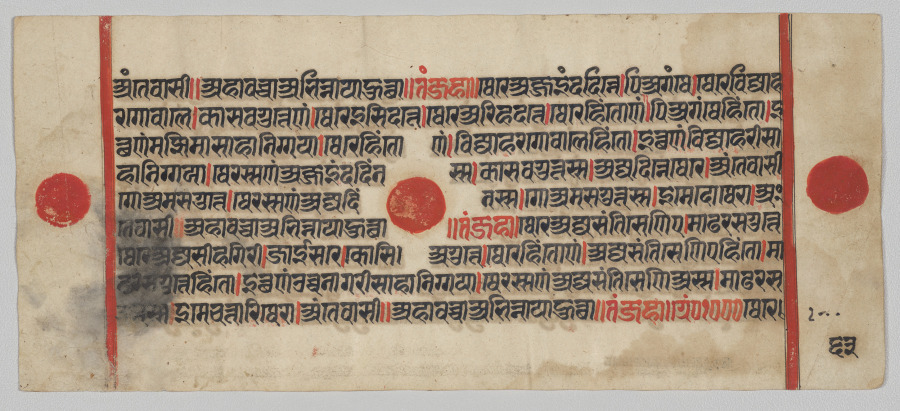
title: Text, Folio 63 (verso), from a Kalpa-sutra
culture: Western India, Gujarat, last quarter of the 15th century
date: c. 1475–1500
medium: Gum tempera, ink, and gold on paper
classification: Painting